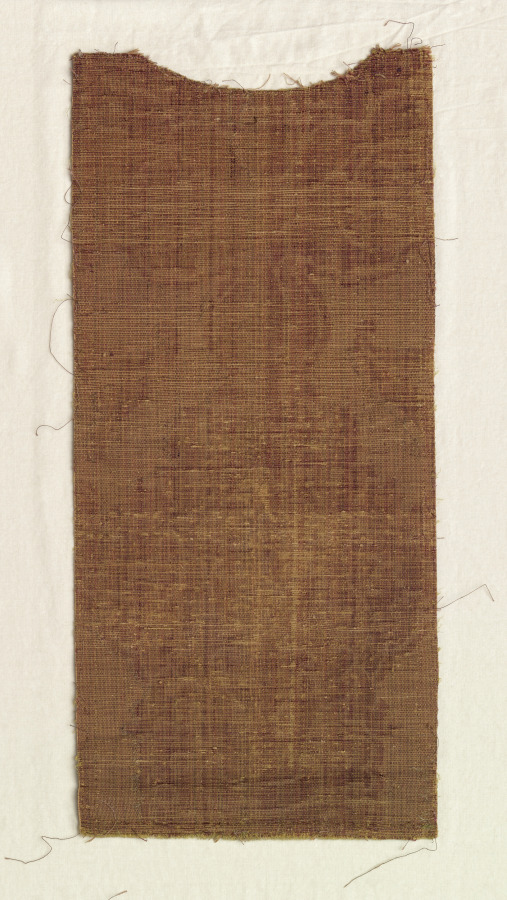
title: Fragments from Chasuble Front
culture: Italy, early 16th century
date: early 1500s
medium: velvet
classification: Velvet